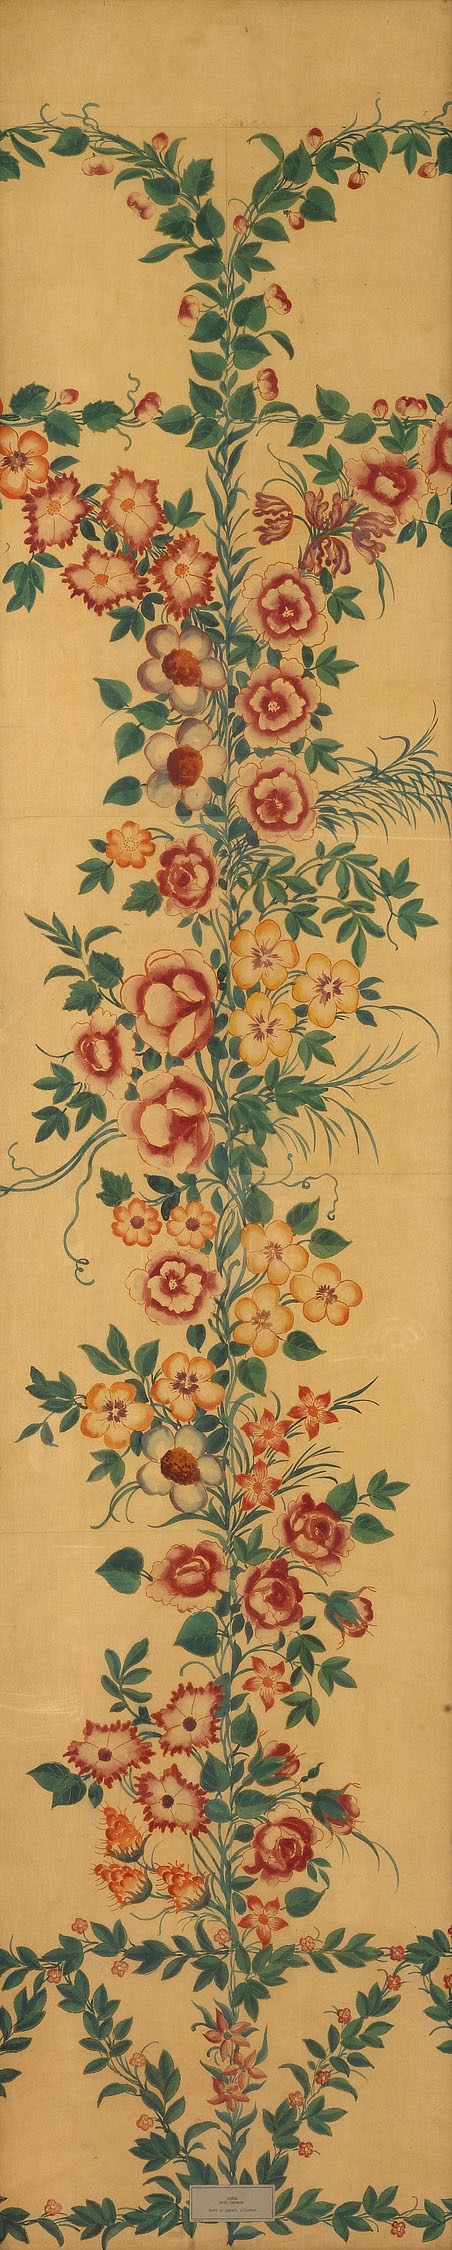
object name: Coverings and Hangings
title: Panel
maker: Possibly United States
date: 19th century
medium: Painted and stenciled paper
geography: United States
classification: wallpaper; paper; european decorative arts